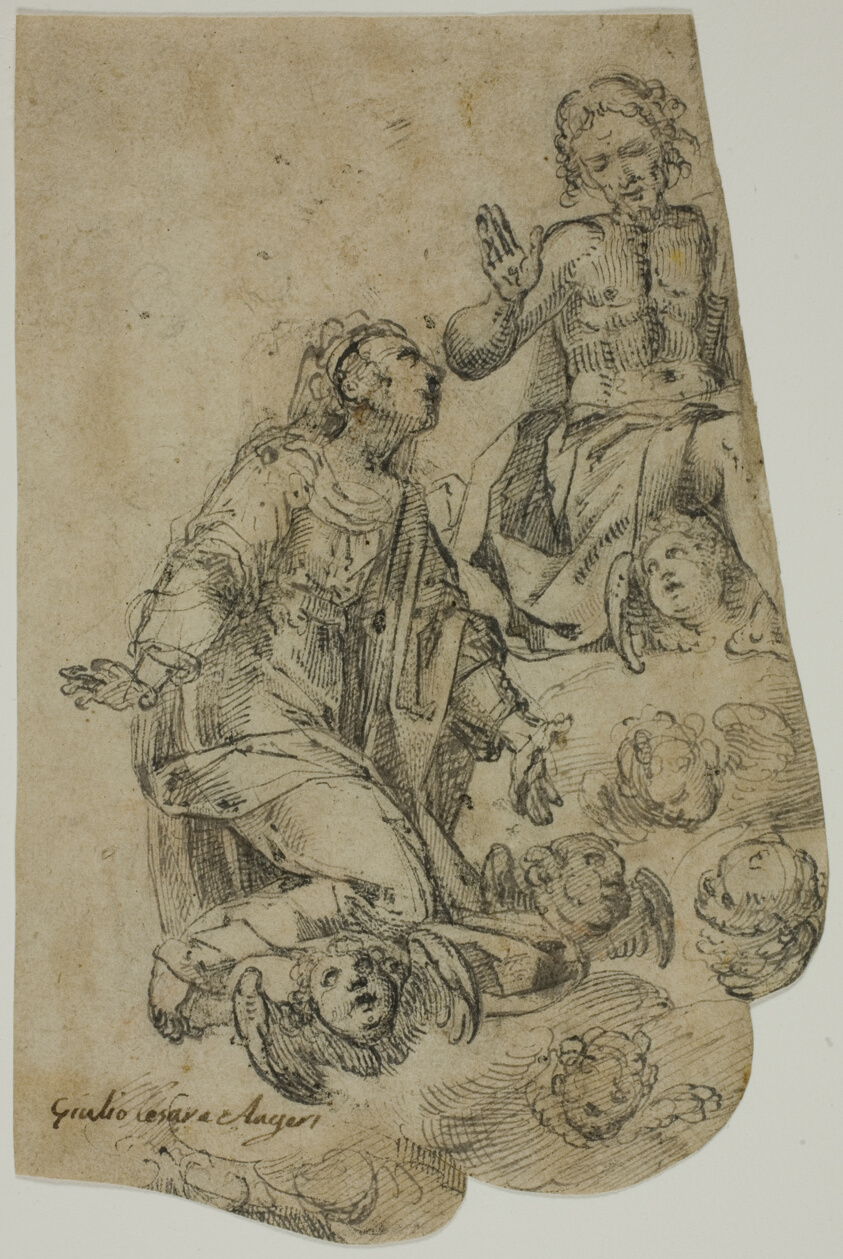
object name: Drawing and Watercolor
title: Christ in Glory with Kneeling Virgin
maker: Giulio Cesare Angeli (Italian, 1570-1630)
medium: Pen and brown ink on buff wove paper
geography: Perugia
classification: drawings (visual works); prints and drawing